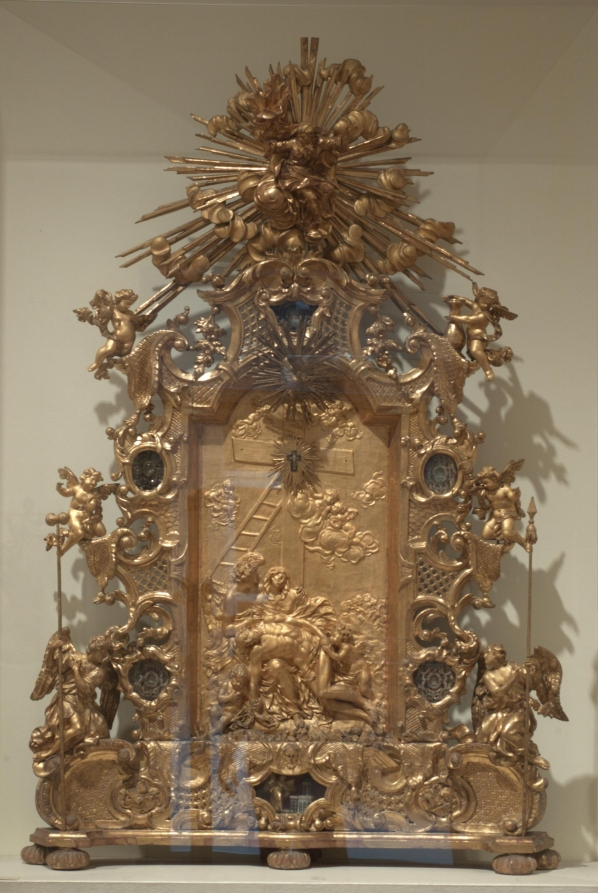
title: Altarpiece with Relics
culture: Germany, Bavaria, 18th century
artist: Joseph Matthias Götz (German, 1696–1760)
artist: and Workshop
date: c. 1735–40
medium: gilded wood, with relics in niches: gilded wood, mother-of-pearl, ebony, red silk, gold wire, seed pearls, rock crystal, pen and ink on paper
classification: Sculpture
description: Götz covers every surface in gold leaf, giving each part of the object equal importance, rather than simply framing a central picture. In this distinctively Central European approach, figural narrative is subordinate to the overall ensemble. Götz designed this object to rest on top of an altar, probably in front of a larger painted or sculpted decorative scheme. The work contains relics seen through the small windows on the perimeter. These small remains of holy figures demonstrate the persistence of a medieval Catholic tradition well into the 1700s.